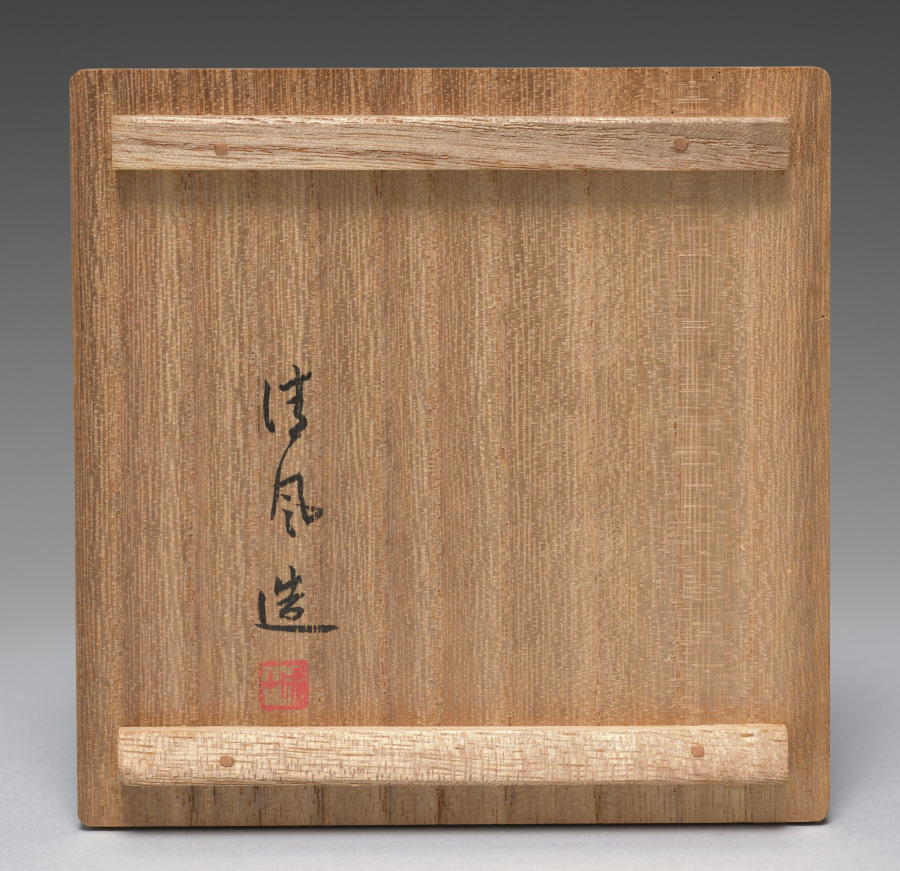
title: Dishes with Flowers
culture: Japan, Taishō period (1912–26) or Shōwa period (1926–89)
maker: Seifū Yohei IV (Japanese, 1872–1951)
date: 1914–46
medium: Set of five dishes; porcelain with underglaze yellow and blue glaze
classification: Ceramic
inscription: 清風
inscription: 清風造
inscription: 成山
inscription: 清風盧人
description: One can imagine a cool summer breeze when looking at this set of dishes, each shaped with a crenulated mouth and glazed with blue. Around the rim and into the basin, the bowls have low-relief designs of flowers with underglaze yellow petals; their leaves and stems show white through the glaze. On each dish, the design continues over the rim onto one side.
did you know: Seifū Yohei IV’s dishes with flowers feature underglaze yellow.